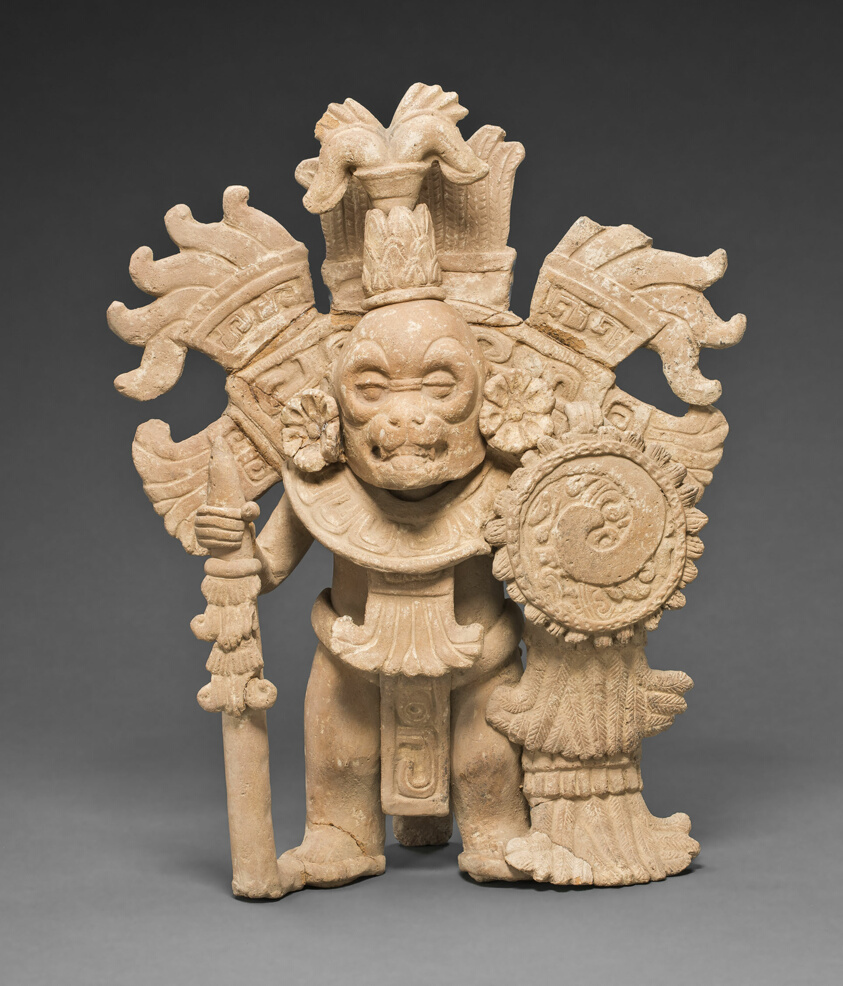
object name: Sculpture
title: Standing Warrior Figure with Removable Mask and Headdress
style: classic veracruz, Arts of the Americas, veracruz, mesoamerican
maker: Classic Veracruz; Veracruz, Mexico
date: 700–1000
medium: Ceramic and pigment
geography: Veracruz state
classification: sculpture; ceramics; masks; art of the americas; statue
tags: warriors, warefare, people